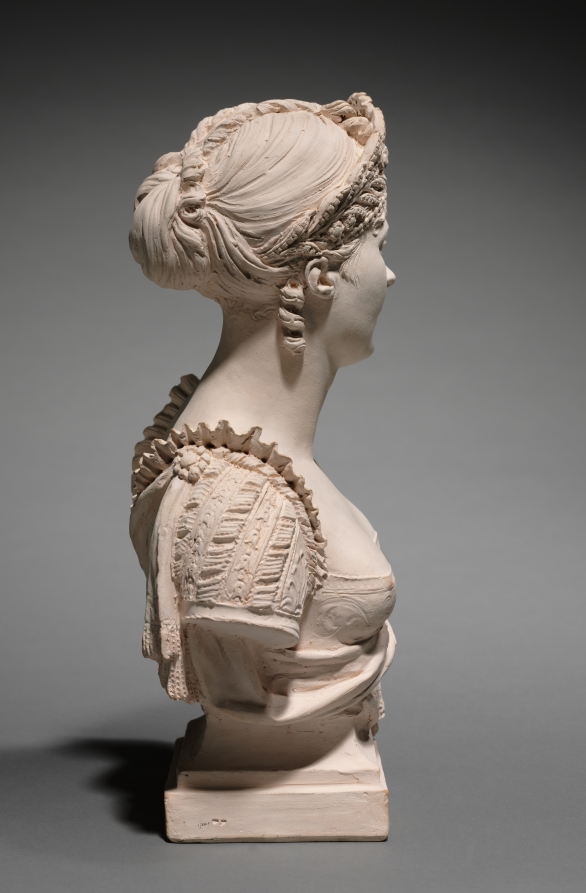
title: Bust of Empress Josephine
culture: France, 19th century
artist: Joseph Chinard (French, 1756–1825)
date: 1805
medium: terracotta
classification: Sculpture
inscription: inscribed on front of base in ligature: "chinard a milan"; inscribed on back of base in ligature: "chinard/de/l'institut m(al?)/membre de plusiere [sp]/ academies/milan-an l (3?)"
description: This bust of the Empress Josephine was sculpted in Milan in 1805 when she accompanied Napoleon to that city for his coronation as the King of Italy.